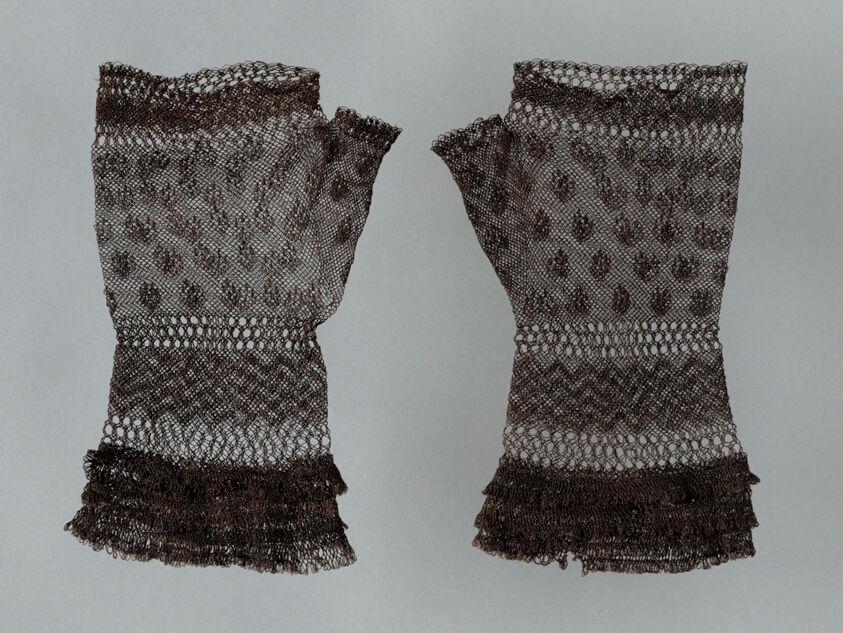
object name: Costume and Accessories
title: Pair of Mits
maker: Europe or United States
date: 1825/75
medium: Silk, bands of Grecian netting, spider netting, square netting, and square netting with looped tufts (lacis)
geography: Europe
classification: textile; costume accessory - miscellaneous; costume; costume accessory; needlework (visual works)